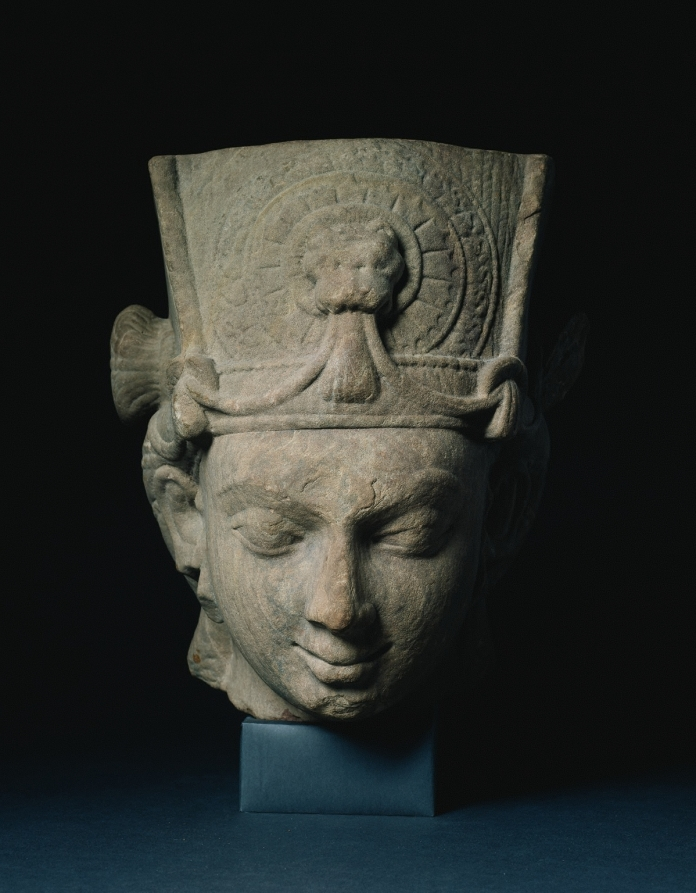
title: Head of Vishnu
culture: Central India, Madhya Pradesh, Vidisha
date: 300s CE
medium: sandstone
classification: Sculpture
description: When complete, this iconic image of the Hindu god Vishnu would have been impressive in scale, approximately life-size. During the Gupta period (c. 319–550 CE), images of Vishnu included a lion head in the center of the crown. The lion communicated royal authority, solar radiance, and the concept of glory. These attributes characterize the power and personality of this deity who ensures the preservation of his creation.